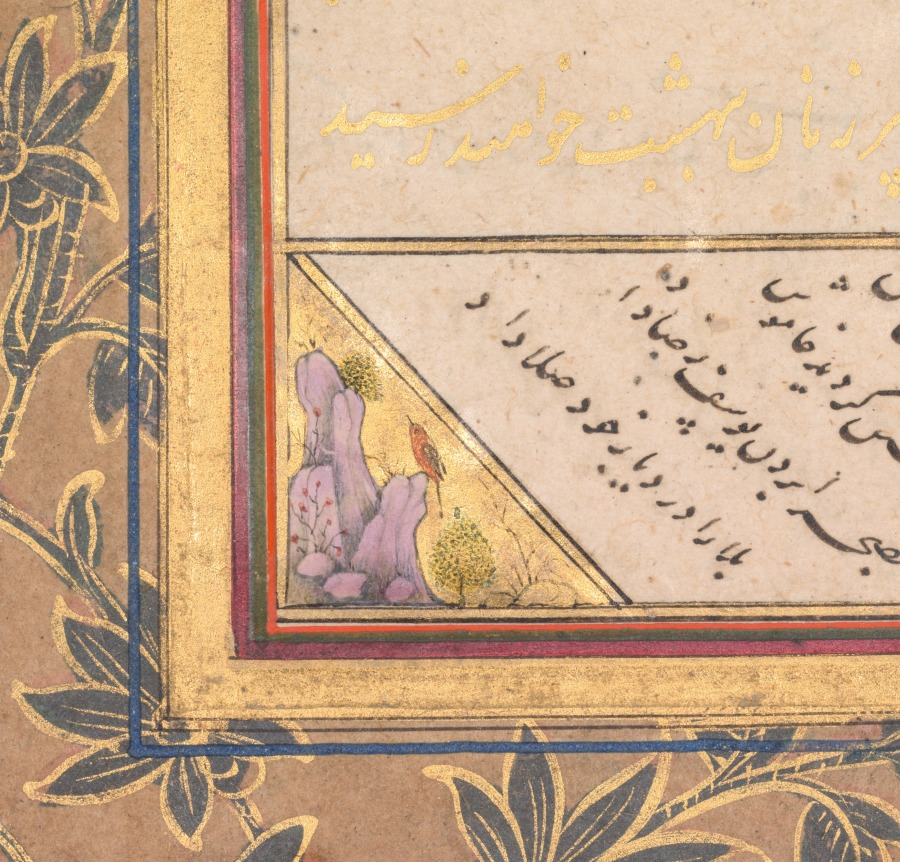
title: Page from a Panj Ganj (Five Treasures) of Abd al-Rahman Jami (Persian, 1414–1492), with two Persian masnavis: Yusuf va Zulaykha (Joseph and Zulaykha) and Subhat al-abrar (Rosary of the Righteous) (verso)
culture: Northern India, Mughal, early 17th century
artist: Mushfiq (Indian, active early 1600s)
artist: and others (Indian)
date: 1520–1607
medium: Gum tempera, ink, and gold on paper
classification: Painting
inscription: The miniature signed at upper left: ' amal - i Mushfiq sana 1015 (the work of the Mushfiq year 1015) Text on verso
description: This page is from a prized manuscript owned by one of the most respected statesmen of the imperial Mughal court, Abd al-Rahim. He served as the Khan Khanan, or vizier, the trusted minister under both Akbar and Jahangir. Abd al-Rahim was an avid book collector and patron of the arts. He acquired this book of five extended narrative poems, which included the story told in rhyme of the romance between Joseph and the Egyptian lady Zulaykha, about 80 years after its completion. The book’s illumination had not been finished, so Abd al-Rahim commissioned the exuberant decor of the borders and insets along with fullpage paintings that illustrate key scenes in the text.